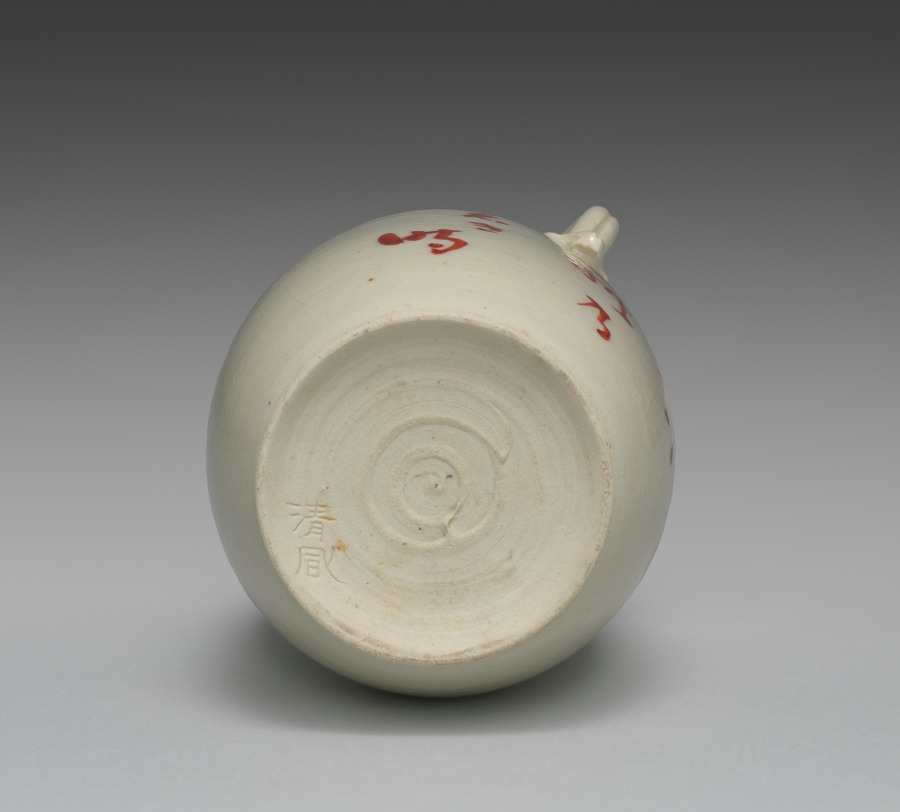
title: Tortoises Sake Pourer from Sake Pourers with Crane and Tortoises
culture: Japan, Meiji period (1868–1912)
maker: Seifū Yohei III (Japanese, 1851–1914)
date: 1893–1914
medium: One of a pair of sake flasks; porcelain with overglaze color enamel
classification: Ceramic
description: This flask has stencil-like paintings of three turtles—a young one with its parents—while the other in this pair has a crane with a leg raised. Cranes and turtles are well-recognized symbols of longevity in East Asia, with the turtle said to live for ten thousand years and the crane for one thousand. Each flask also has a poem on the back, one in Chinese and the other in Japanese. The latter, which appears on the turtle flask, reads kame iwaku kamiyo wa, ore no wakaki toki. The seventeen syllable poem begins with “turtle” and ends with “when I was young.” It can be translated as, “the turtle said the world of the gods began when I was young.”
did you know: This pair of seemingly humble sake pourers celebrate longevity and delight in a literary tradition that embraces multiple forms of poetic expression.